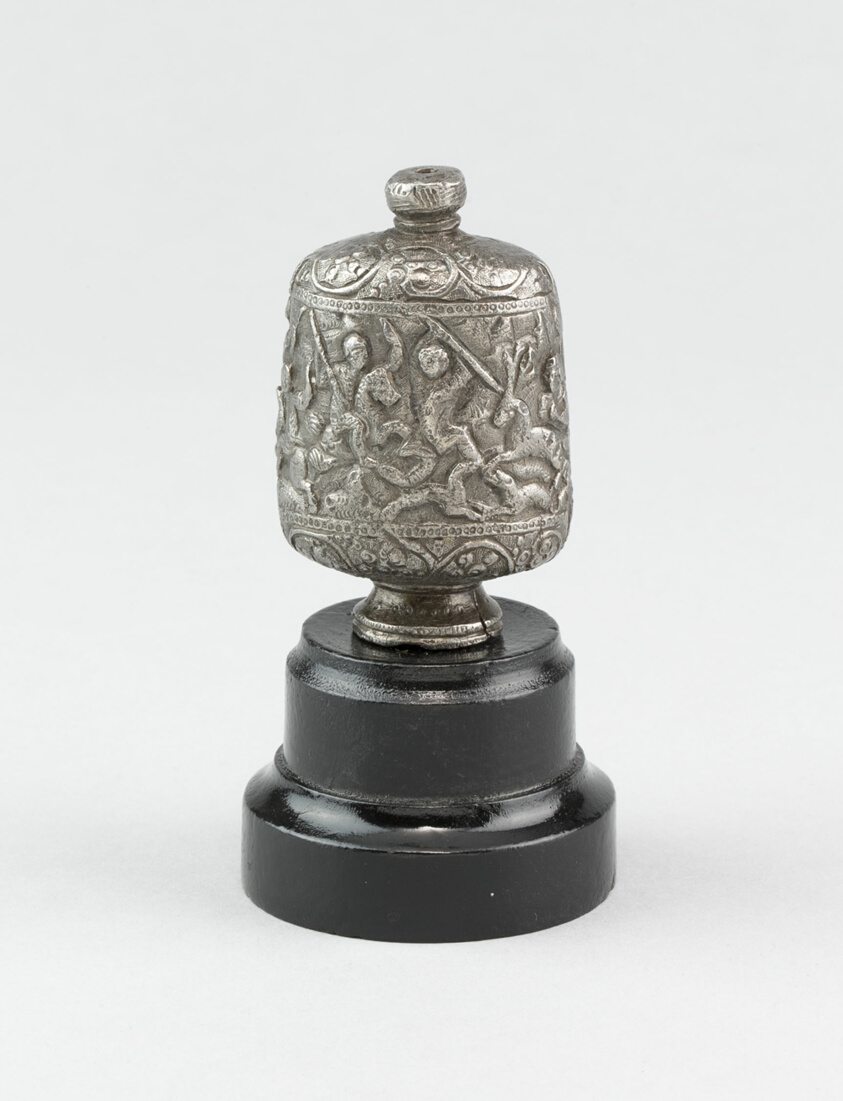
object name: Arms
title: Sword Pommel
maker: European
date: early 17th century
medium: Iron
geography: Europe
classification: edged weapon-sword; arms; arms and armor